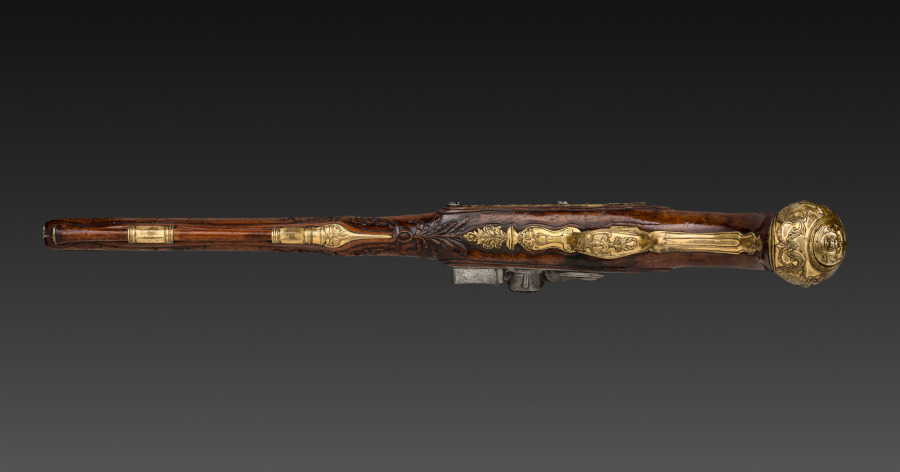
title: Flintlock Pistol (2 of 2)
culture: Franco-Flemish, Liège, early 18th Century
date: early 1700s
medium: steel with gold inlay, gilt-brass mounts; walnut burl stock; chiseled high-relief decoration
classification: Arms and Armor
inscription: on barrel: G. MASSIN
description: The barrel of this pistol is signed G. MASSIN, a gunsmith apparently working in eastern France or French-speaking Flanders, possibly the city of Liège. The exquisite ornament along the breech of the barrel is chiseled and engraved. The gilded lock-plate and mounts may be compared to the finest contemporary work in other media, such as furniture with ormolu mounts.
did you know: The flintlock ignition system was developed in the 1600s and remained the dominant system until the early 1800s.